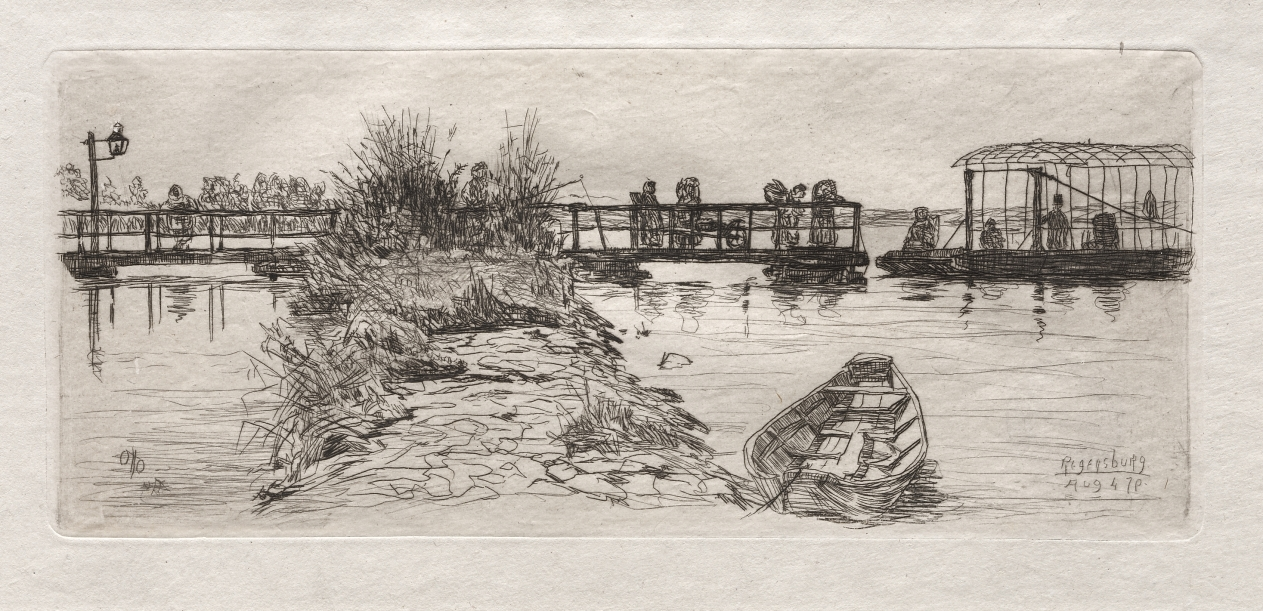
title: Regensburg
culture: America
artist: Otto H. Bacher (American, 1856–1909)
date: 1879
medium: etching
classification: Print